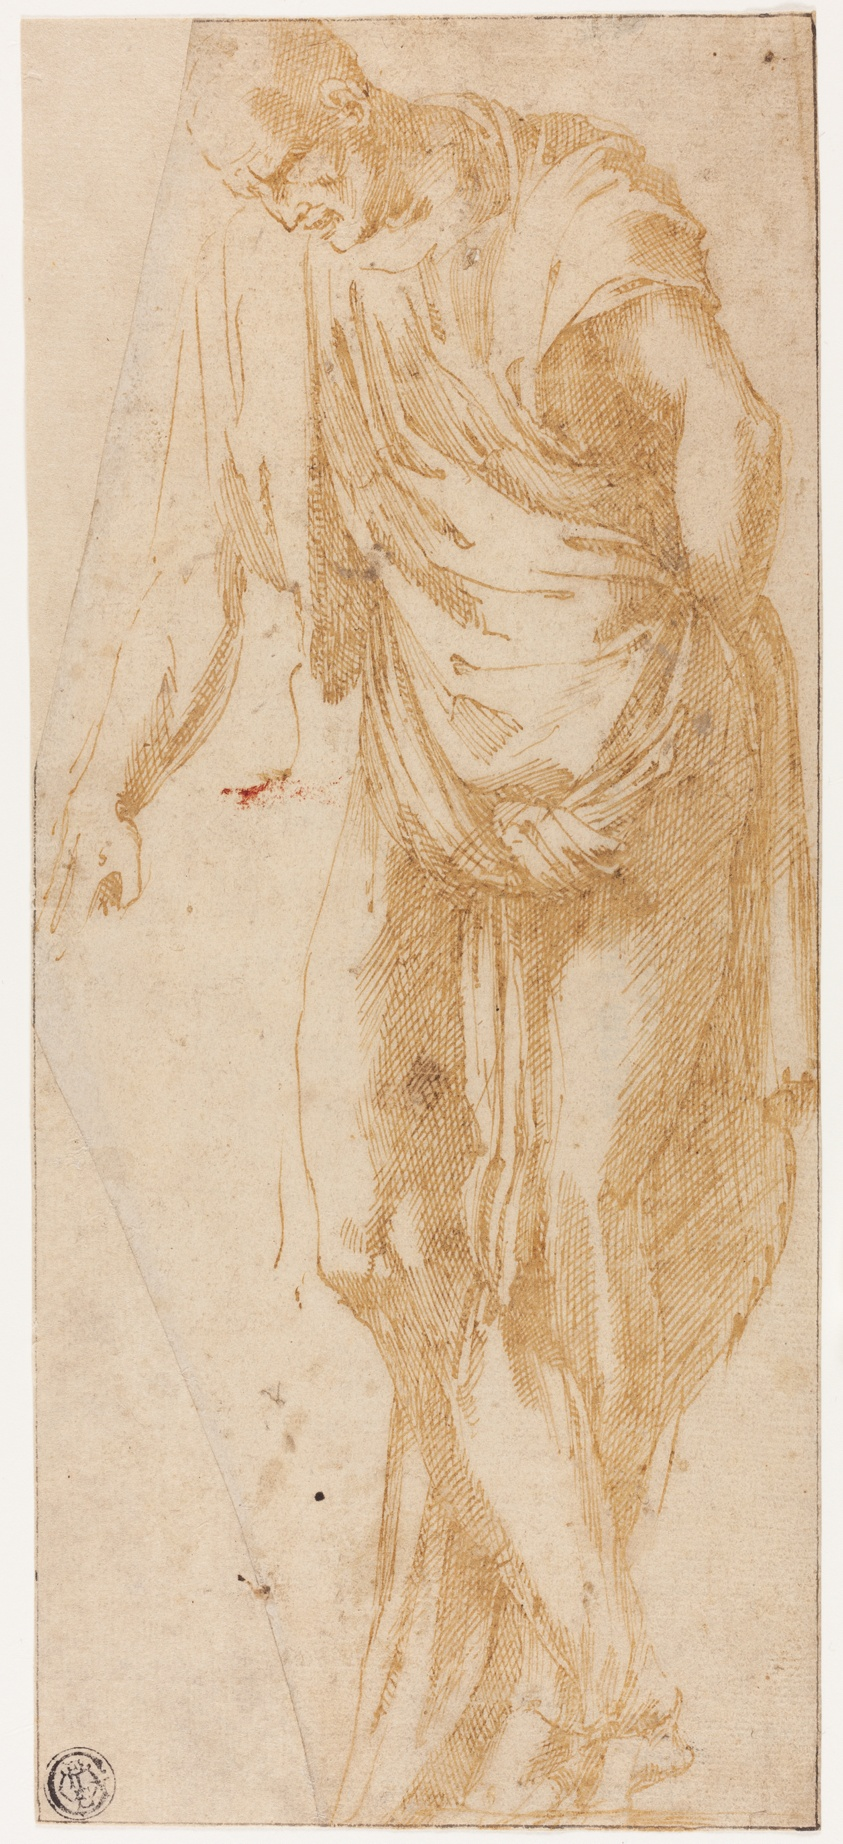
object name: Drawing and Watercolor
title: Study of Levi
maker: Alonso Berruguete (Spanish, 1486-1561)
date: 1526/32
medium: Pen and brown ink, on tan laid paper, tipped onto yellow wove paper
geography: Spain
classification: pen and ink drawings; drawings (visual works); prints and drawing